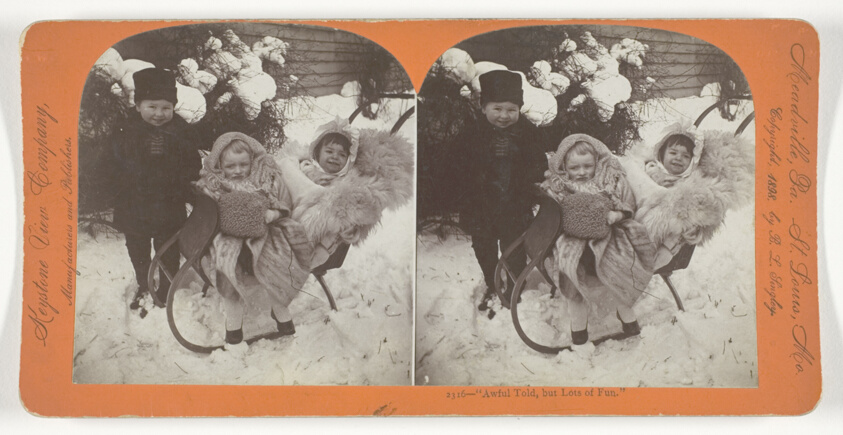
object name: Photograph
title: "Awful Told, but Lots of Fun"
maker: Keystone View Company; American, 1892-1963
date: 1898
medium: Albumen print, stereo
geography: Saint Louis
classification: photography; photograph; albumen silver print; stereograph (albumen)